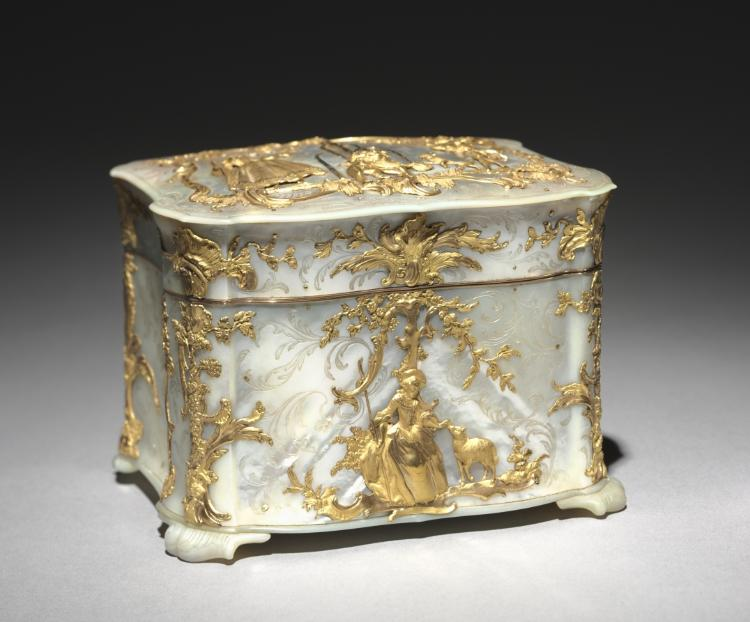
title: Sewing Box with Implements (Nécessaire)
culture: Austria, possibly Vienna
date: c. 1765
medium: gold and mother-of-pearl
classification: Miscellaneous